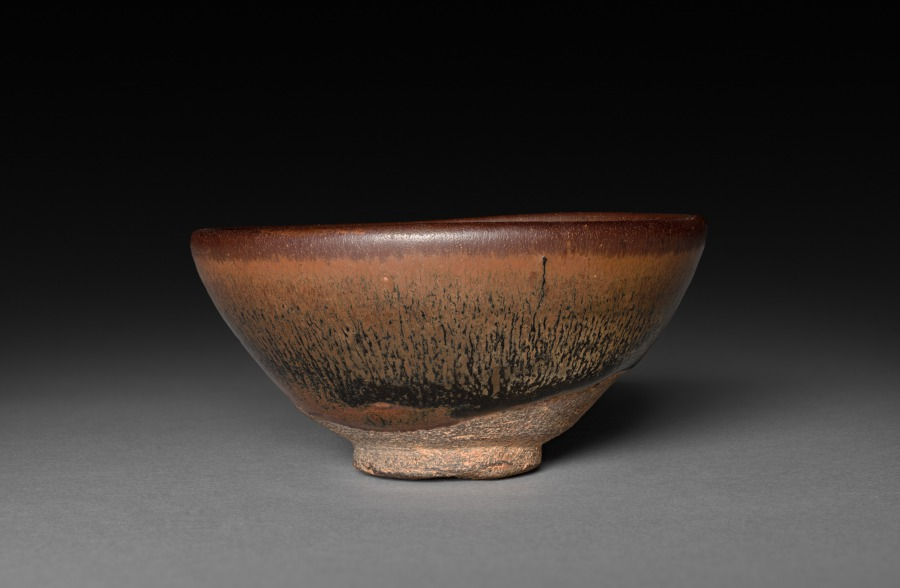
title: Tea Bowl: Jian ware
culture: China, near Shui ch'i, Song dynasty (960-1279)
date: 960–1279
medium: purplish brown stoneware with iron slip glaze coating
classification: Ceramic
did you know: Jian ware was very popular with the tea cultures in China and Japan.